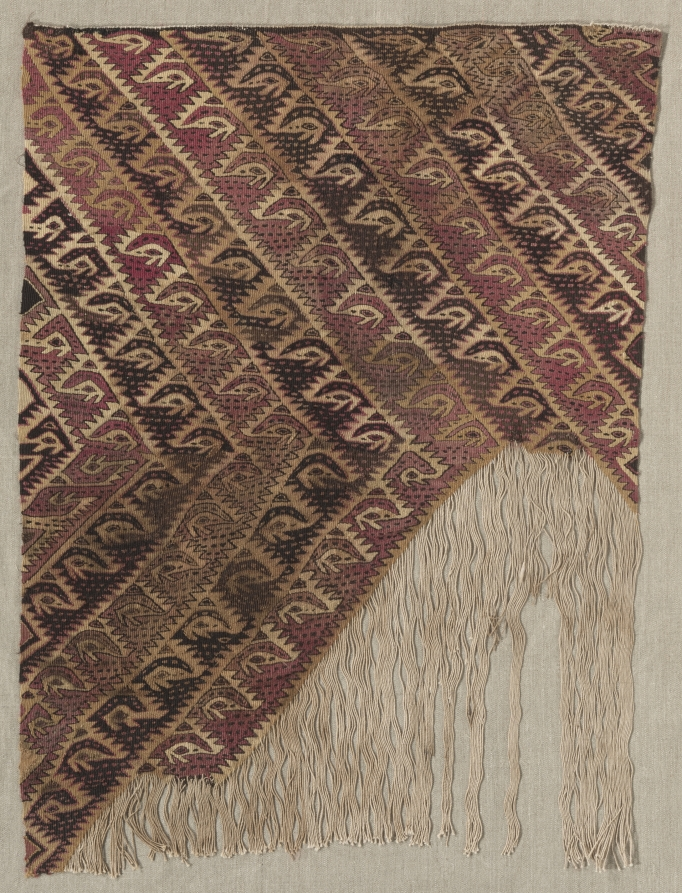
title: Unfinished Cloth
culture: Peru, Central Coast, Chancay, Pachacamac, 12th-15th century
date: c. 1100–1400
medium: tapestry weave; cotton and wool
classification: Textile